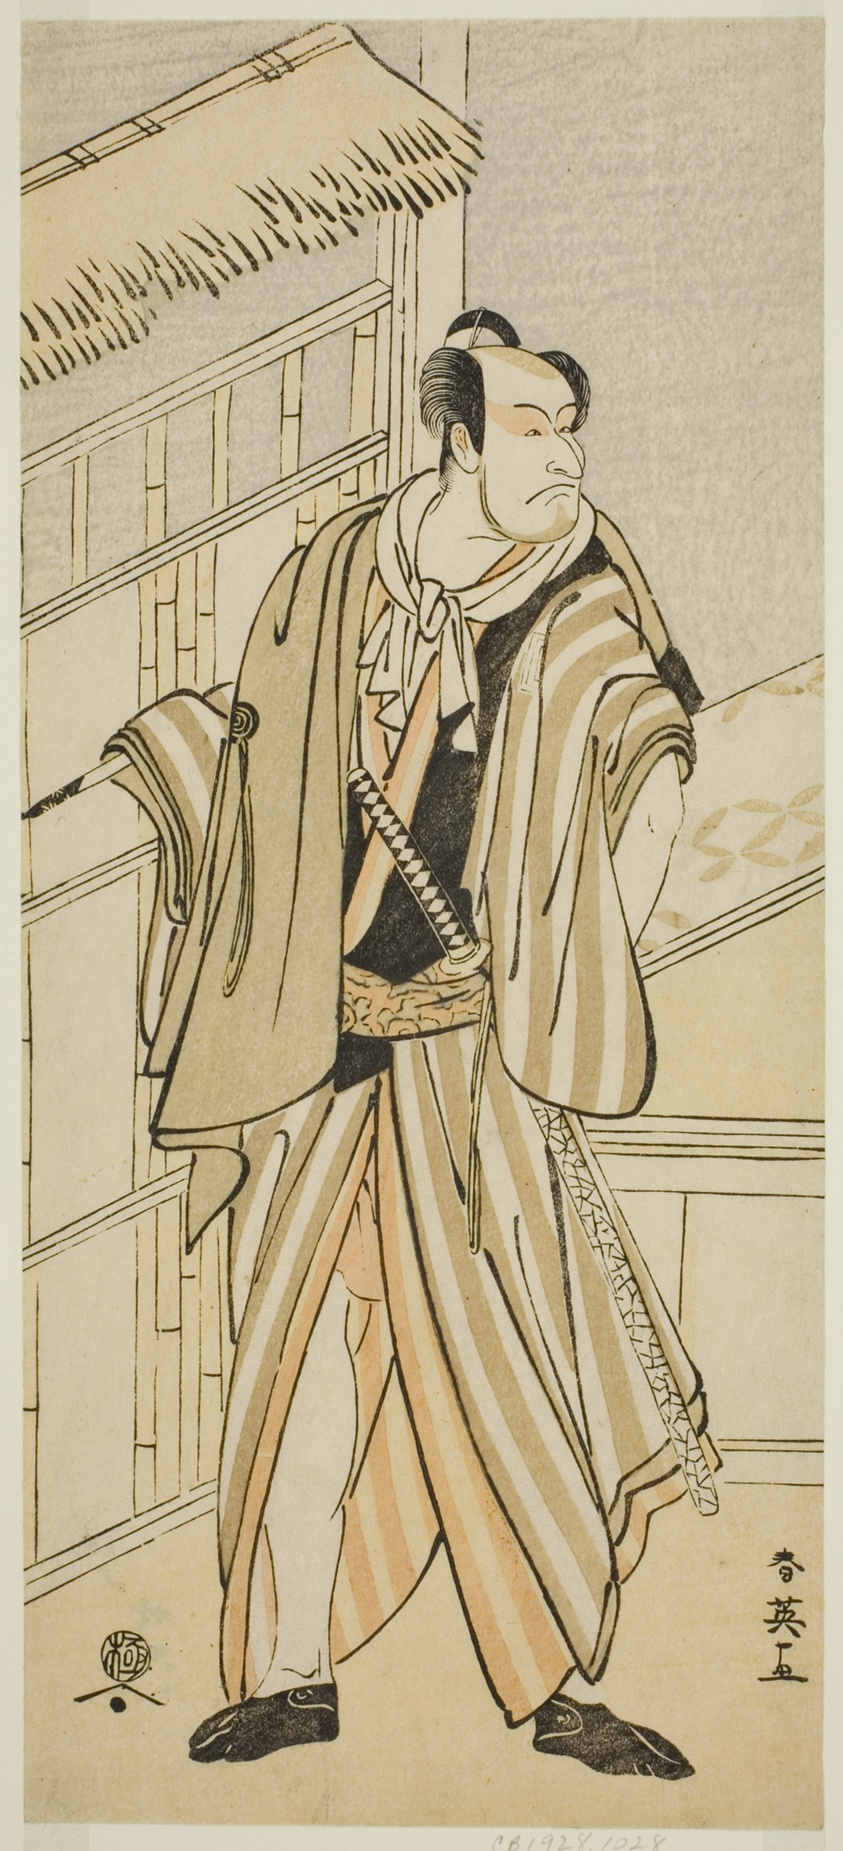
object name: Print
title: The Actor Ichikawa Ebizo (Danjuro V) as Banzui Chobei in the Play Gozen-gakari Sumo Soga, Performed at the Kawarazaki Theater in the Second Month, 1793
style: Japanese (culture or style)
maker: Katsukawa Shun'ei (Japanese, 1762-1819)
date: c. 1793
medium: Color woodblock print; left sheet of hosoban diptych (right: 1928.1029)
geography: Japan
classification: woodblock print; print; asian art